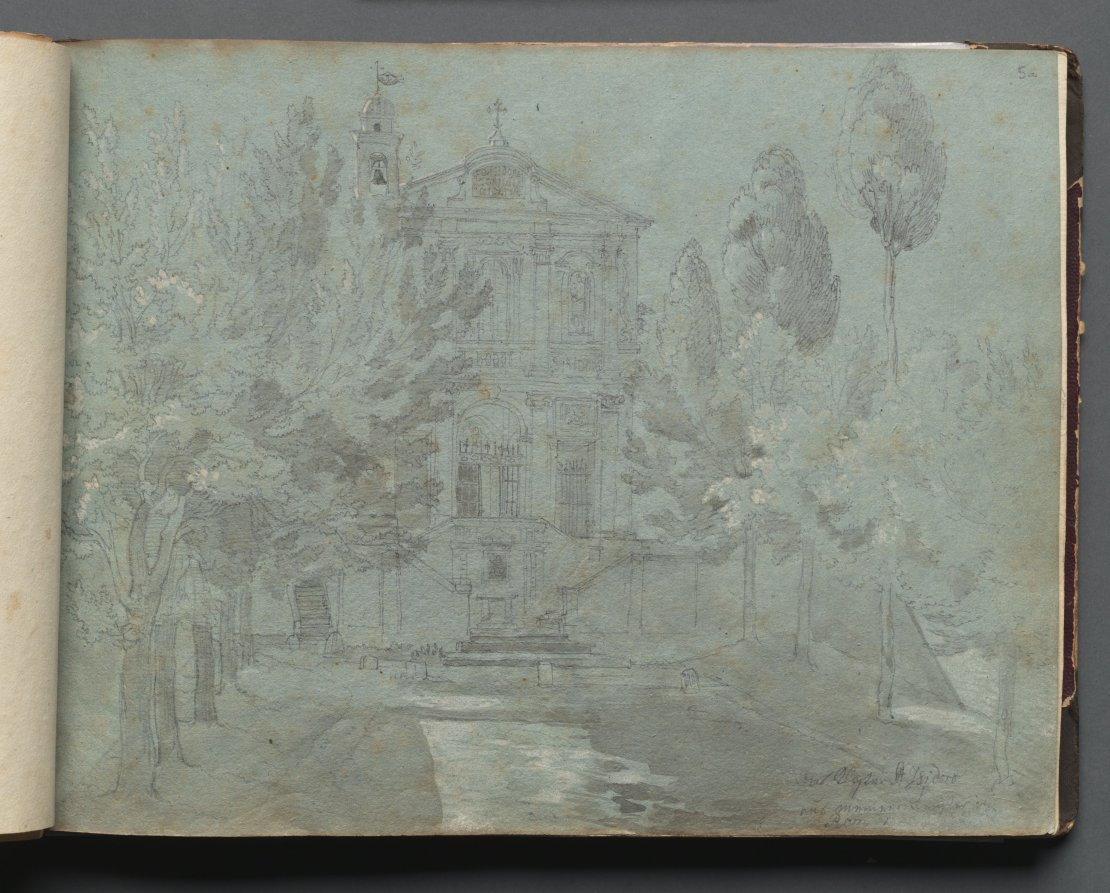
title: Album with Views of Rome and Surroundings, Landscape Studies, page 05a: "Saint Isidoro"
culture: Germany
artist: Franz Johann Heinrich Nadorp (German, 1794–1876)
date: c. 1830s-70s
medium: graphite and gray wash with white highlighting on blue paper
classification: Bound Volume